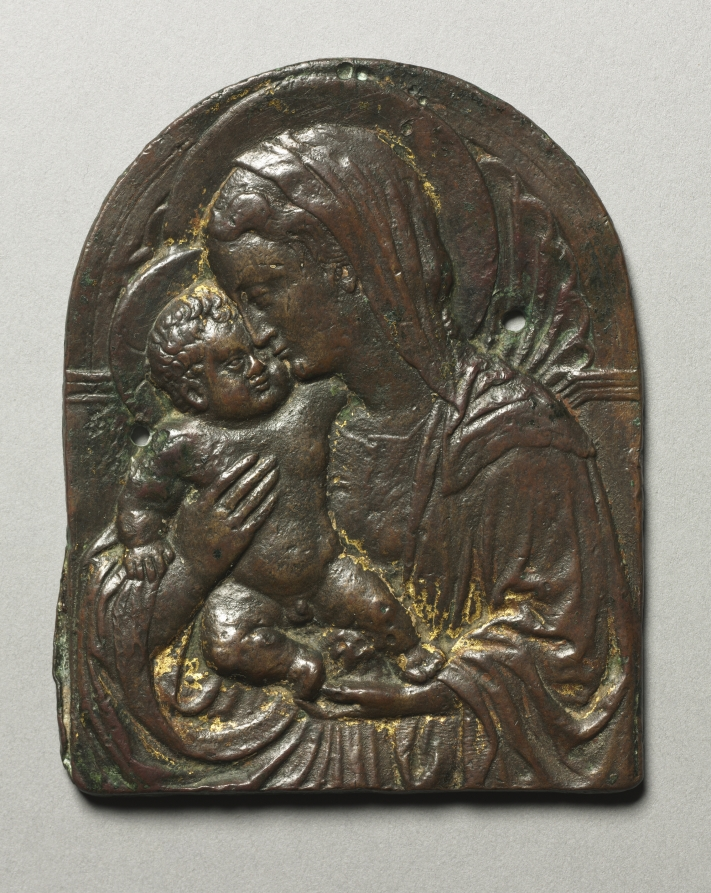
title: Virgin and Child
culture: Italy, 15th century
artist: circle of Donatello (Italian, c. 1386–1466)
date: c. 1440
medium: bronze with traces of gilding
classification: Sculpture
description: Plaquettes emerged during the Renaissance in connection with the revival of interest in ancient Greek and Roman coins and medallions. This small-scale devotional image provided a personal and private connection between the owner and the religious figures. The two small holes suggest that it may have been hung on a wall, and the child's foreshortened arms and slant of the Virgin's head could imply that it was originally placed above eye level.